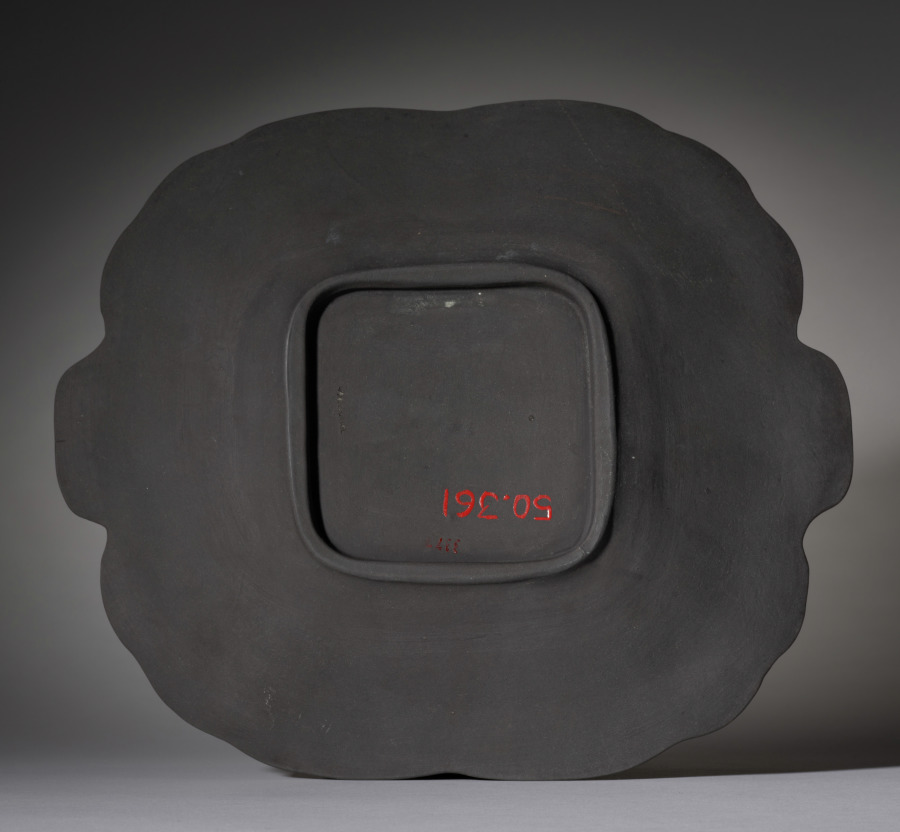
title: Plate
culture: England, Staffordshire, 19th century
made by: Wedgwood Factory (British)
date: 1800s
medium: black basalt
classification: Ceramic